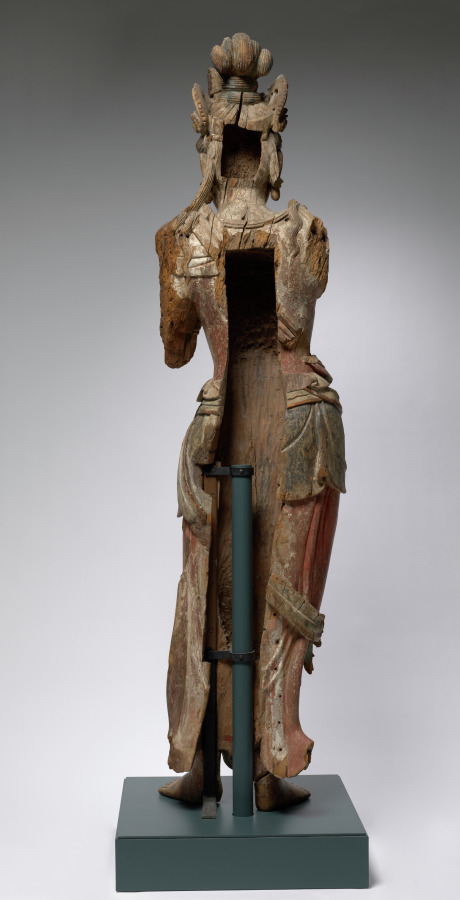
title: Eleven-Headed Guanyin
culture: China, late Northern Song dynasty (960-1127) - Jin dynasty (1115-1234)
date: 1100–1200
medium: wood with polychromy and cut gold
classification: Sculpture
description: The bodhisattva is an enlightened being dedicated to the spiritual awakening of all beings. The compassionate bodhisattva Guanyin, in a variety of manifestations, is probably the most popular deity of worship in Chinese Buddhism. In the Esoteric Buddhist form shown here, this standing Guanyin has a total of eleven heads, with smaller ones above the principal head. The uppermost head represents the Buddha Amitabha, to whom he is closely related. The eleven heads symbolize the Buddha’s steps on the path to enlightenment.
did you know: This Guanyin is carved from a single block of willow (genus Salix sp.).